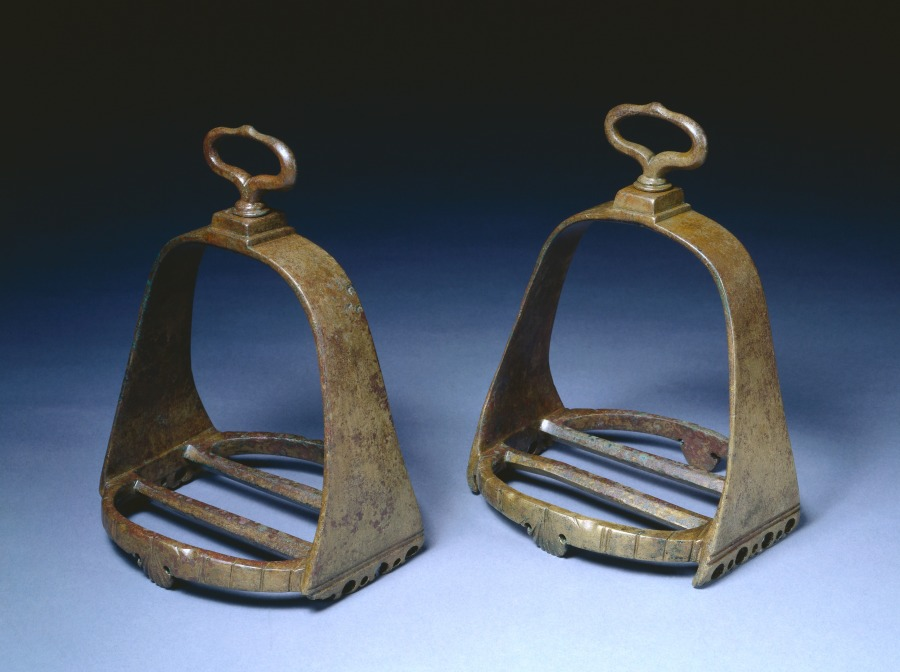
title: Pair of Stirrups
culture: England (?), 17th century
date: 1600s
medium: brass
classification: Arms and Armor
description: With the aid of stirrups, the knight could rise (especially during jousts) and, buttressed against the high cantle of the saddle, bend forward in order to gain the full advantage of the weight of his own armor and that of his horse. The footplate of the stirrup gradually became wider, as shown by these examples from the 1600s.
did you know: Although more fragile than non-rotating systems, the swivel suspension eye allowed the stirrup leather to stay flat against the horse’s flank when it was in use.